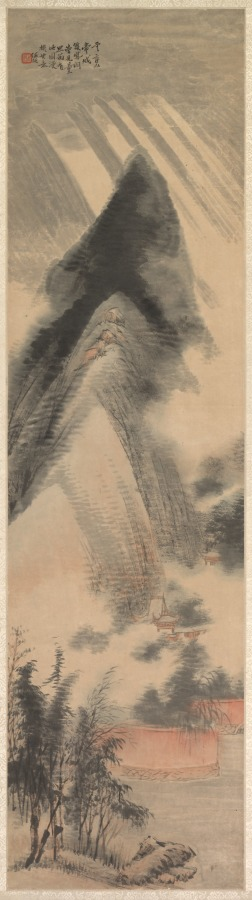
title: Landscape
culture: China, Qing dynasty (1644-1911)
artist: Ren Yu (Chinese, 1853–1901)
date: 1892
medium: Hanging scroll; color on paper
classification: Painting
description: This seasonal landscape is from a set of four hanging scrolls by Ren Yu. He was the youngest, most eccentric, and least prolific of the Four Rens, a family of prominent painters in Shanghai during the late Qing dynasty (1644–1911). Perhaps due to his opium habit and subsequent financial difficulties, Ren Yu tended to be lackadaisical in his work. The few remaining high-quality paintings hint at his artistic potential lost to opium. Though Ren’s premature death left his artistic promise unfulfilled, his paintings were acquired and donated to the museum by Charles Lang Freer (1854–1919), a wealthy businessman and art collector from Detroit. As Freer had hoped, this donation of Ren Yu paintings inspired the young Cleveland Museum of Art to continue to expand its own Chinese painting collection.